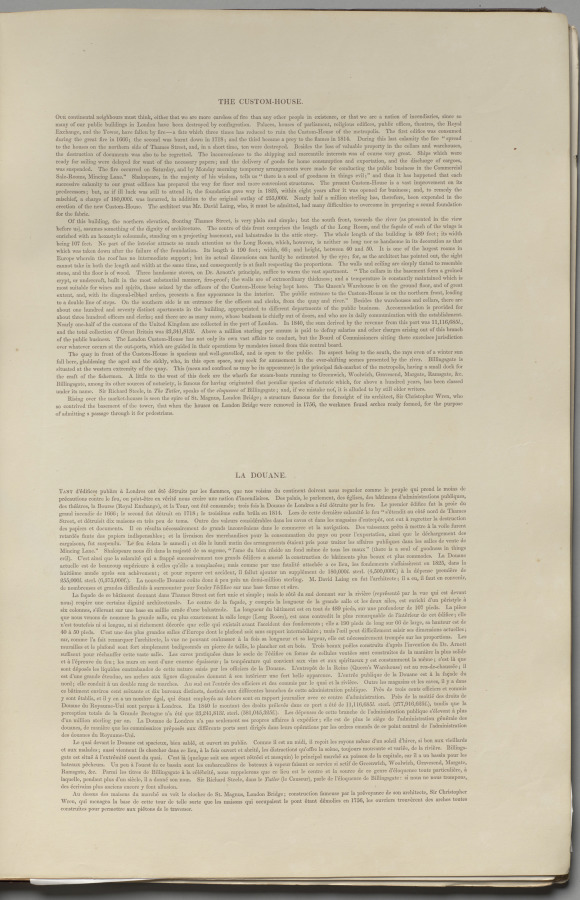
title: London As It Is: Doorway, The Custom House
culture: England, 19th century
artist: Thomas Shotter Boys (British, 1803–1874)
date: 1842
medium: lithograph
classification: Bound Volume